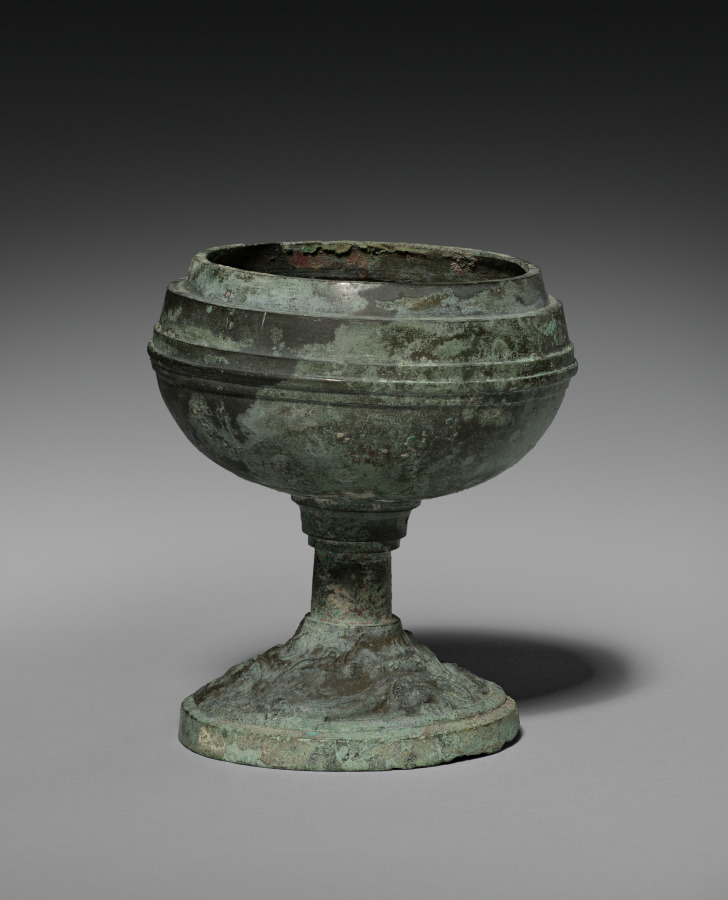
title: Incense Burner (Boshan Lu)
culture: China, Western Han dynasty (206 BCE–8 CE)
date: 200–100 BCE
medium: bronze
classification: Metalwork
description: The conical cover of this incense burner represents a miniature mountain with hunting scenes. The cover was shrouded in mist and emanated intoxicating smoke through its openwork when fragrant woods and herbs were burnt in its stem cup, transporting its beholder into an imaginative realm.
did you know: Deities (appearing as hunters) and fantastic beasts roam freely among mists and clouds on this incense burner.